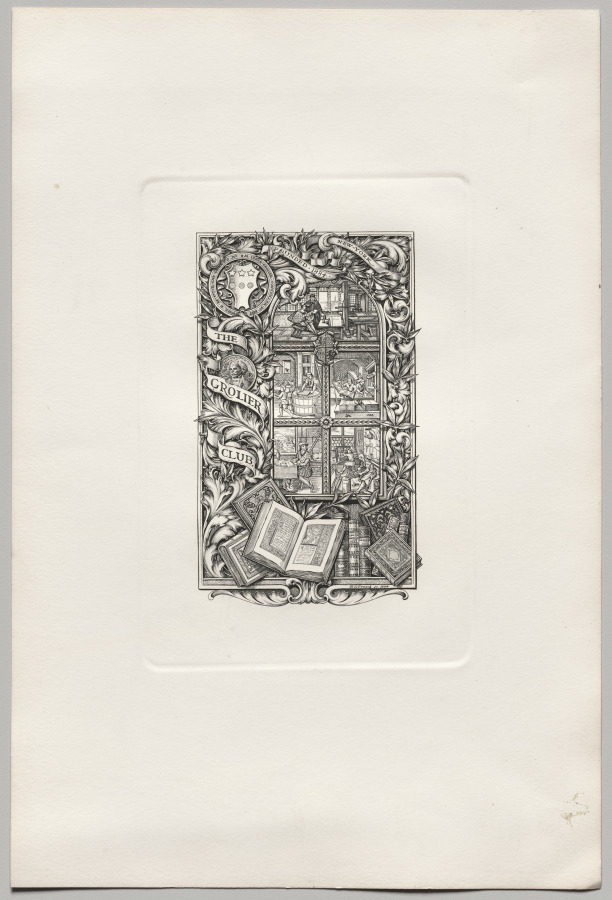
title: Bookplate for the Grolier Club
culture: America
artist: Edwin Davis French (American, 1851–1905)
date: 1894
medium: engraving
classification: Print